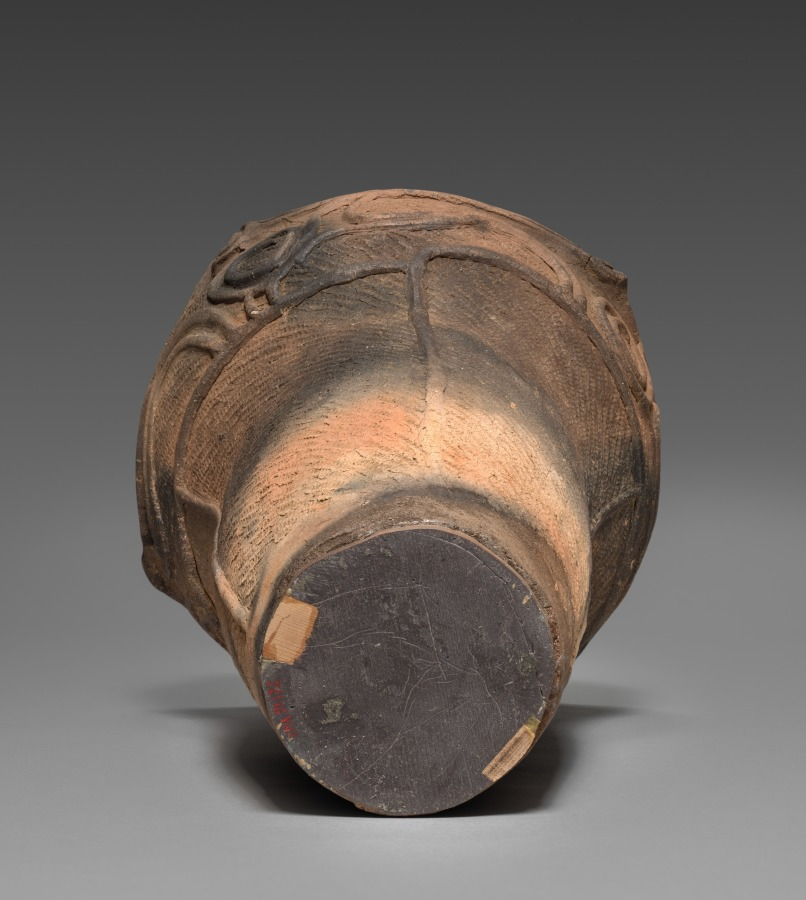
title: Cooking Vessel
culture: Japan, Jōmon period (c. 10,500–300 BCE)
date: c. 2500 BCE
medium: earthenware with impressed and applied designs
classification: Ceramic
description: This asymmetrical vessel has designs made by pressing cord or rope onto the damp clay and cylinders of clay applied to the surface. Based on its designs and shape, it was likely produced in the northern Kanto region. For reasons unknown today, different regions created signature styles.